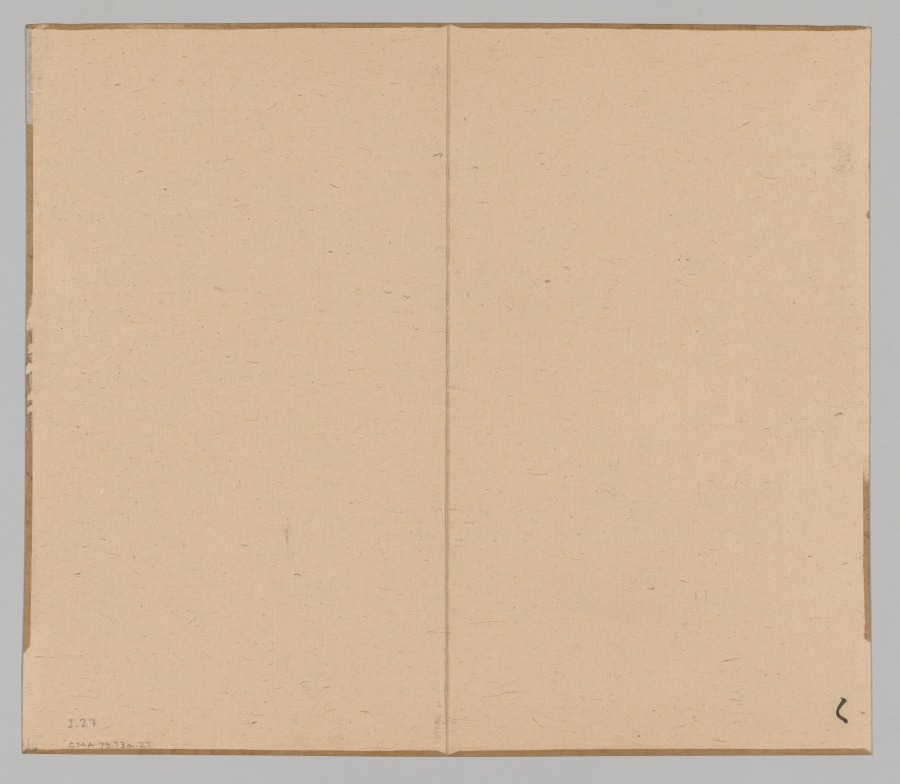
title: Reverberations of Taiga, Volume 1 (leaf 27)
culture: Japan, Edo period (1615–1868)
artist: Aoki Shukuya (Japanese, d. 1802)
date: mid- to late 1700s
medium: double-leaf from a pair of albums; ink and light color on paper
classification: Portfolio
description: Traditionally, young painters in Japan began their studies with an established master-painter. The master's compositions invariably became models that the apprentice copied to learn various ink and brush techniques. Shukuya was a pupil of the famous Kyoto artist Ikeno Taiga, whose style is reflected in these sketches of rocks, trees, and mountains.